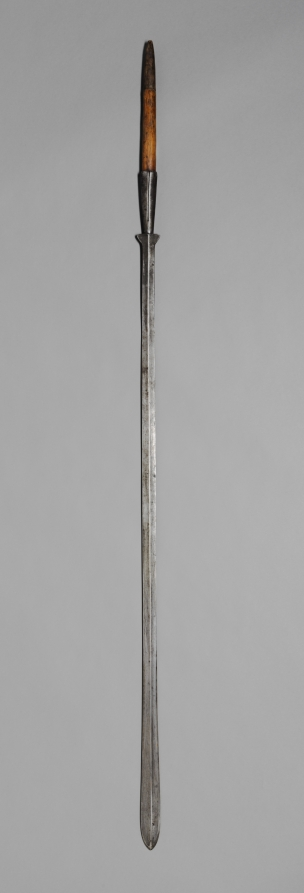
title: Fragment of a Spear (eng'erempe or eremet)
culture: Africa, Eastern Africa, Kenya, Masaai style, unknown maker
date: 1900s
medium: iron and wood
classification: Arms and Armor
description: Masaai men of different ages use different styles of weapons. Though this example is incomplete, the long, flat blade indicates that it once belonged to a man whose age group was called moran (junior warrior). Held at the middle by the wood shaft, the weighty spear was balanced by a now-missing butt end, essentially a slender metal spike. These weapons were practical, and were often used by moran in lion hunting.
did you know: This spear was used along with a shield.